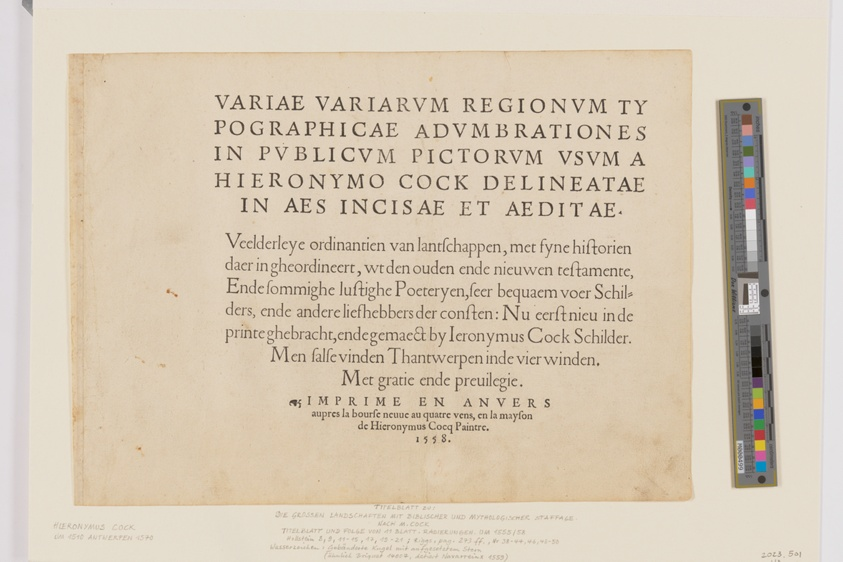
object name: Print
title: Title Page, from Landscapes with Biblical and Mythological Scenes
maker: Hieronymus Cock (Netherlandish, c. 1510–1570); after Matthys Cock (Netherlandish, c. 1505-1548)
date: 1558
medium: Letterpress on ivory laid paper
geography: Netherlands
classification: letterpress; paper; print; prints and drawing